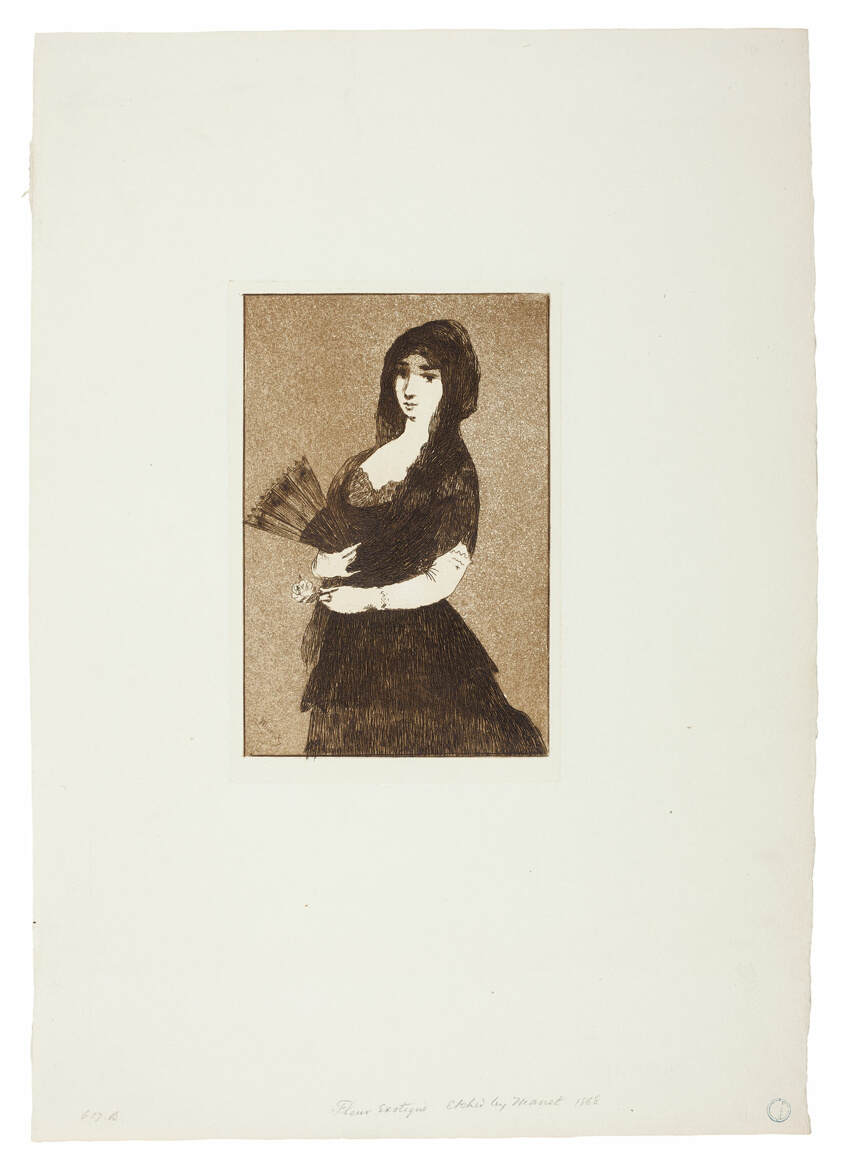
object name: Print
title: Exotic Flower (Woman in a Mantilla)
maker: Édouard Manet (French, 1832-1883); published by Philippe Burty (French, 1830-1890); written by Armand Renaud (French, 1836-1895)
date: 1868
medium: Etching and aquatint in brown on ivory chine, laid down on ivory wove paper (chine collé)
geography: France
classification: etching; print; prints and drawing